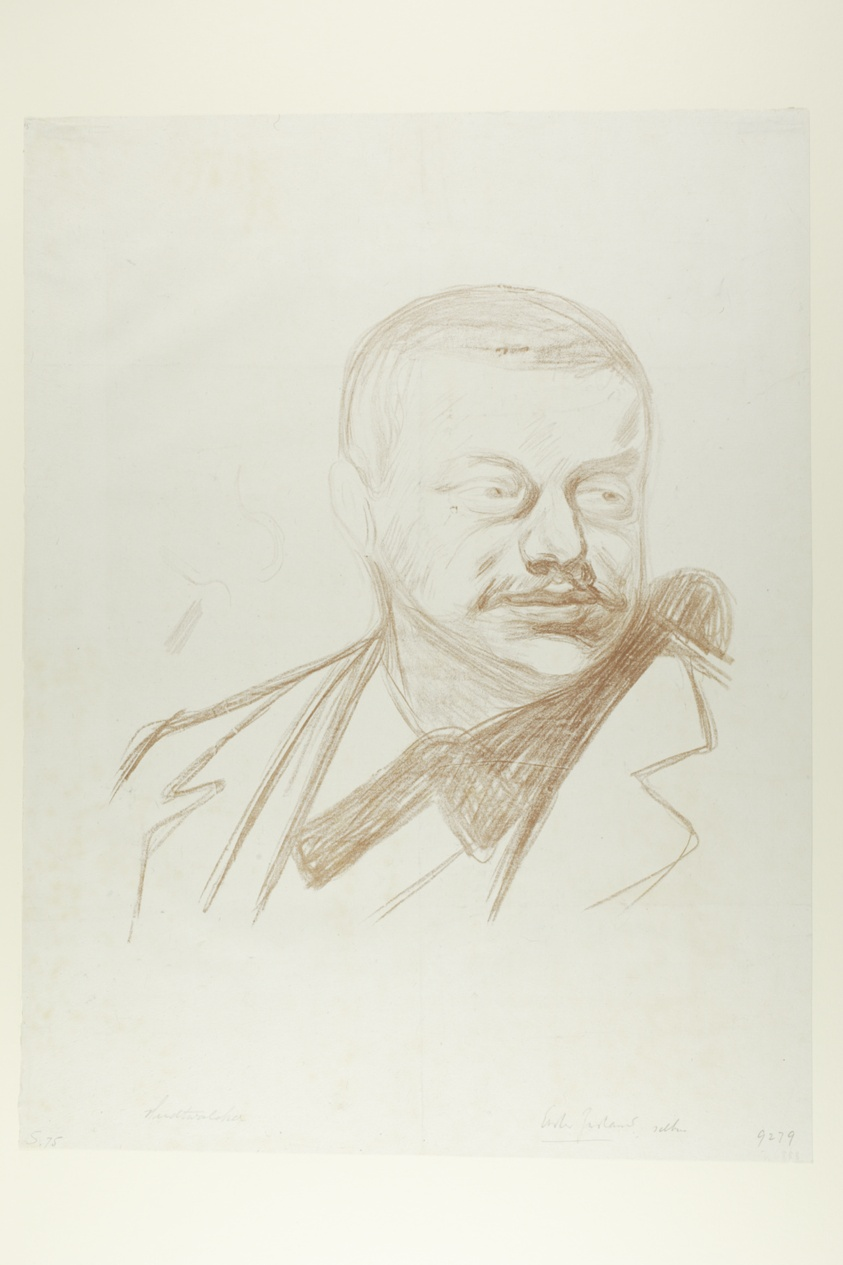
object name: Print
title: Gunnar Heiberg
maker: Edvard Munch (Norwegian, 1863-1944); printed by Lassally (German, late 19th-early 20th century)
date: 1896, printed after 1906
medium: Lithograph on cream Japanese paper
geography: Norway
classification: lithograph; print; prints and drawing